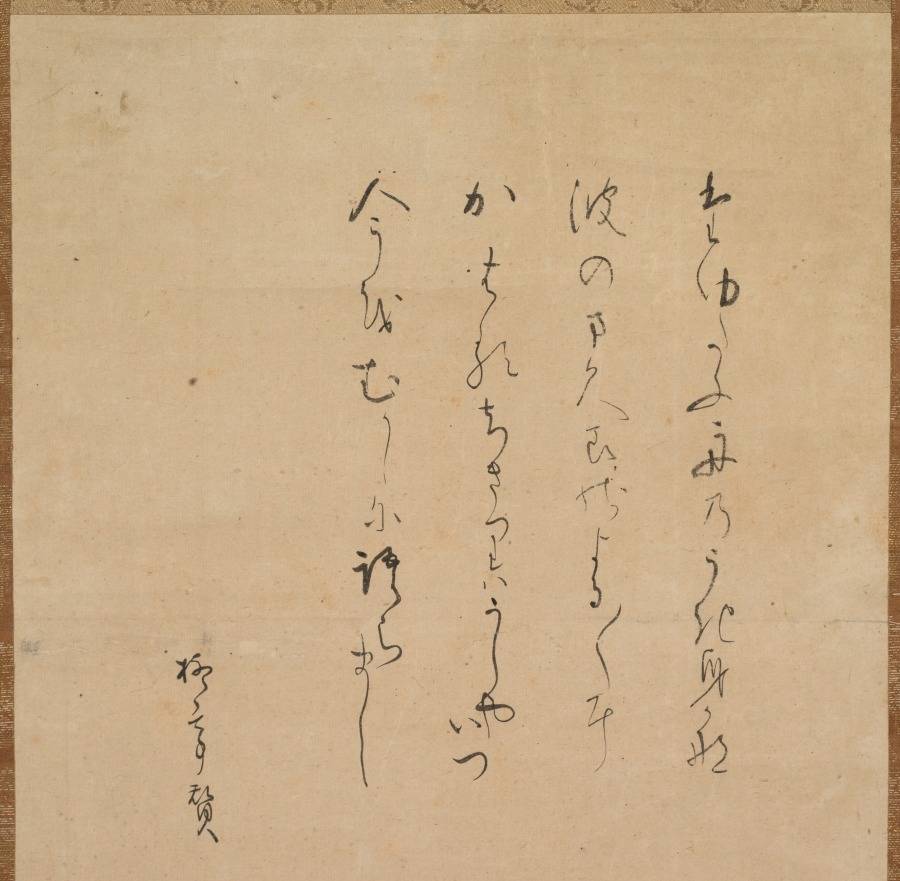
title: Beauty (Bijin)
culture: Japan, Edo period (1615–1868)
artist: Katsushika Hokusai (Japanese, 1760–1849)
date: c. 1775–1849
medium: hanging scroll; ink and color on paper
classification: Painting